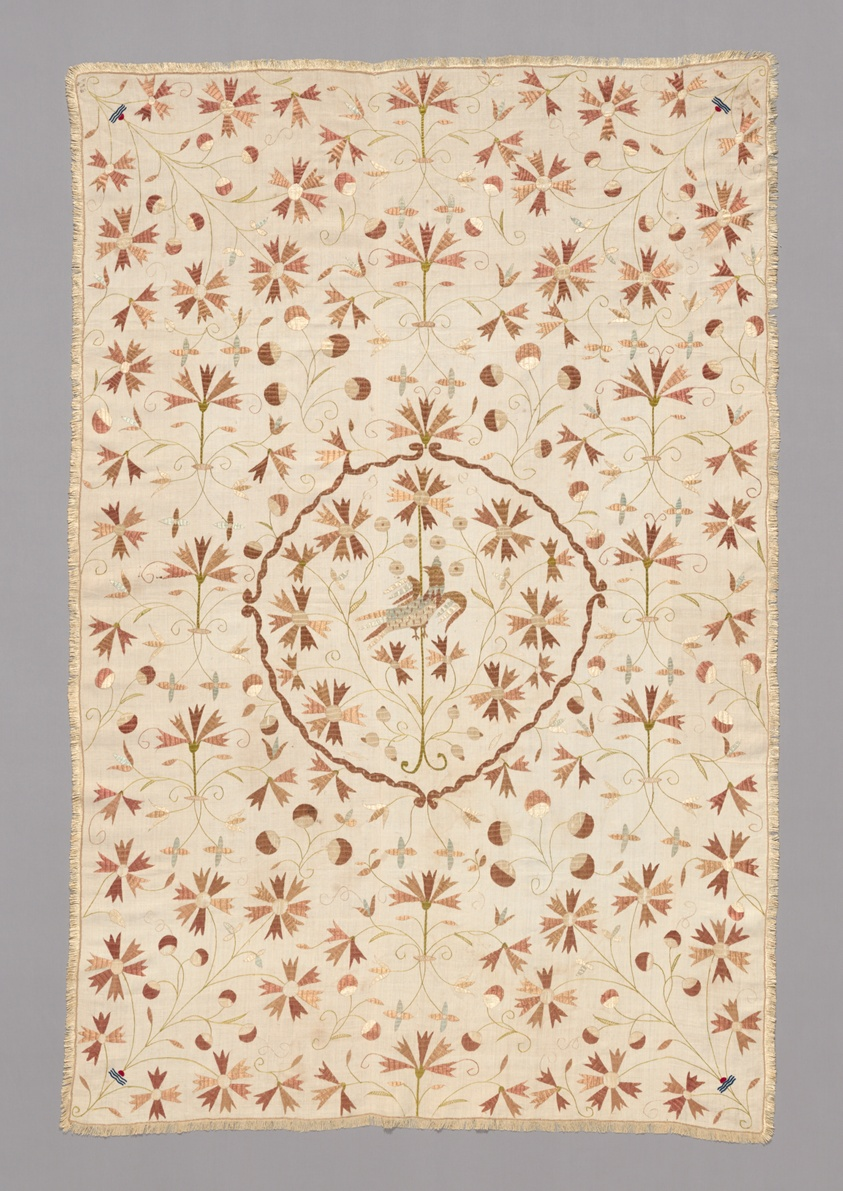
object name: Textile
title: Bedcover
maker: Portugal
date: 18th century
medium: Linen, plain weave; embroidered with silk in herringbone and stem stitches; laid work and couching; edged with silk and linen, plain weave extended weft loop fringe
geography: Portugal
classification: textile; needlework (visual works)